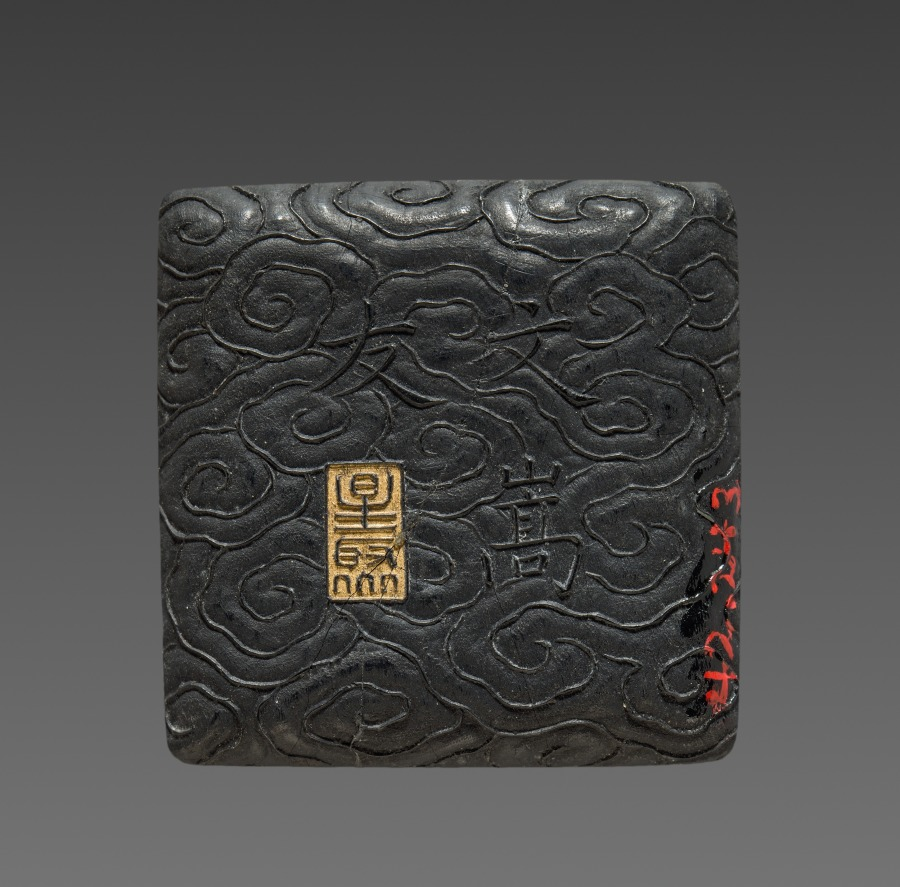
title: Ink Cake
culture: China, Qing dynasty (1644-1911)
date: 19th Century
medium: ink cake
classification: Miscellaneous